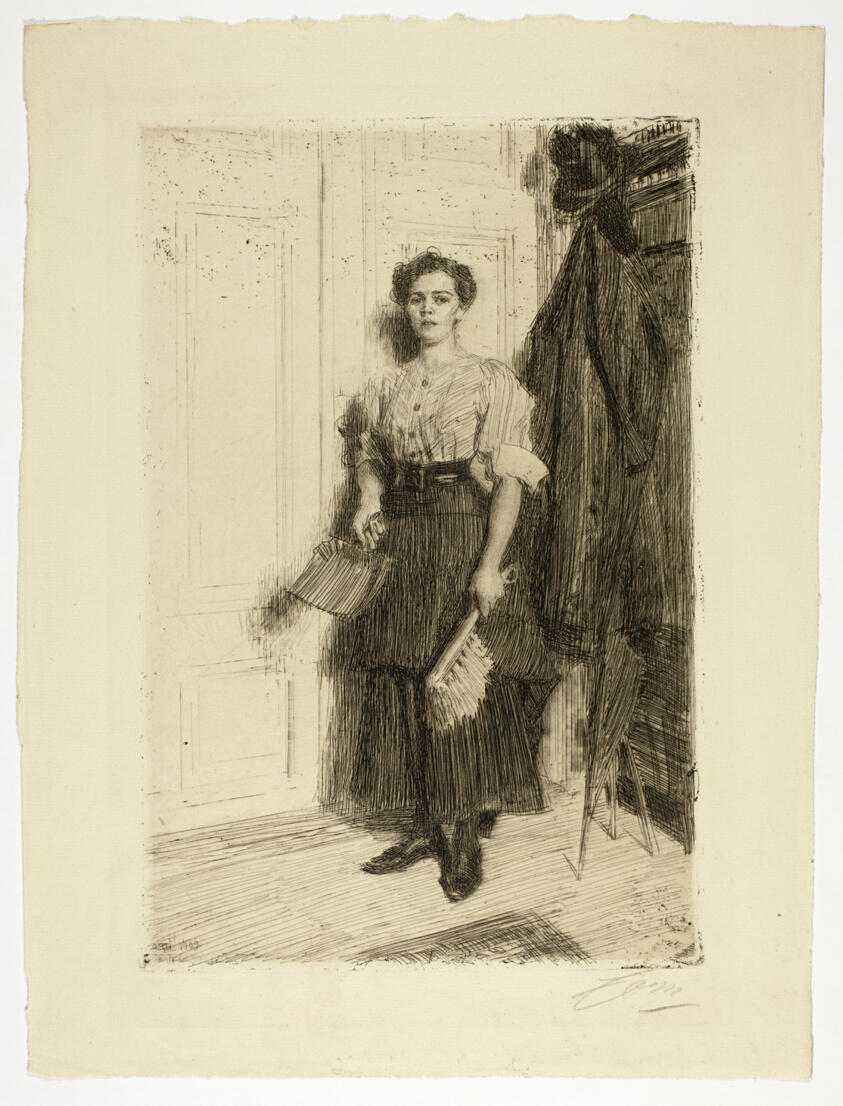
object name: Print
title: The New Maid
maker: Anders Zorn (Swedish, 1860-1920)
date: 1909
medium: Etching on ivory laid paper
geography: Sweden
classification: etching; paper; print; prints and drawing